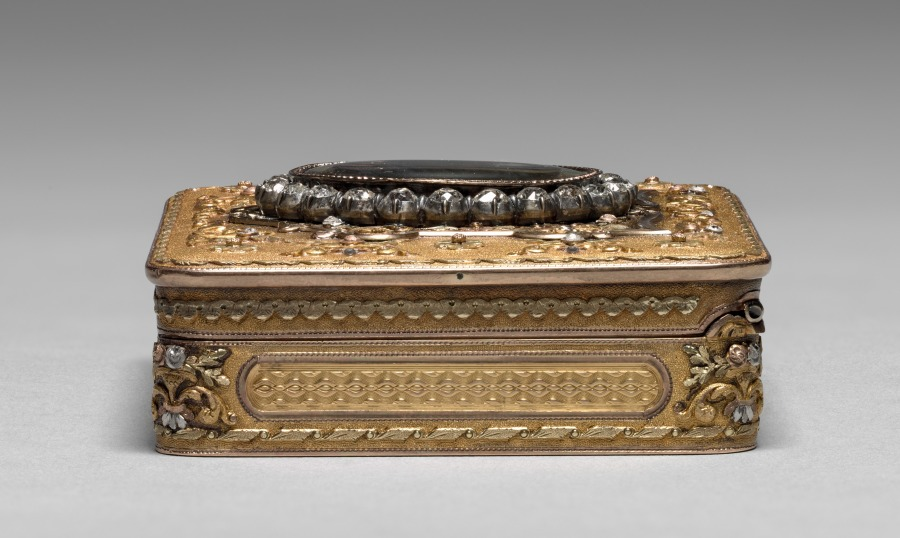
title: Portrait of a Man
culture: Switzerland, Neufchatel, mid-19th century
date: mid 1800s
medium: watercolor on ivory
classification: Miscellaneous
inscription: signed: "B."